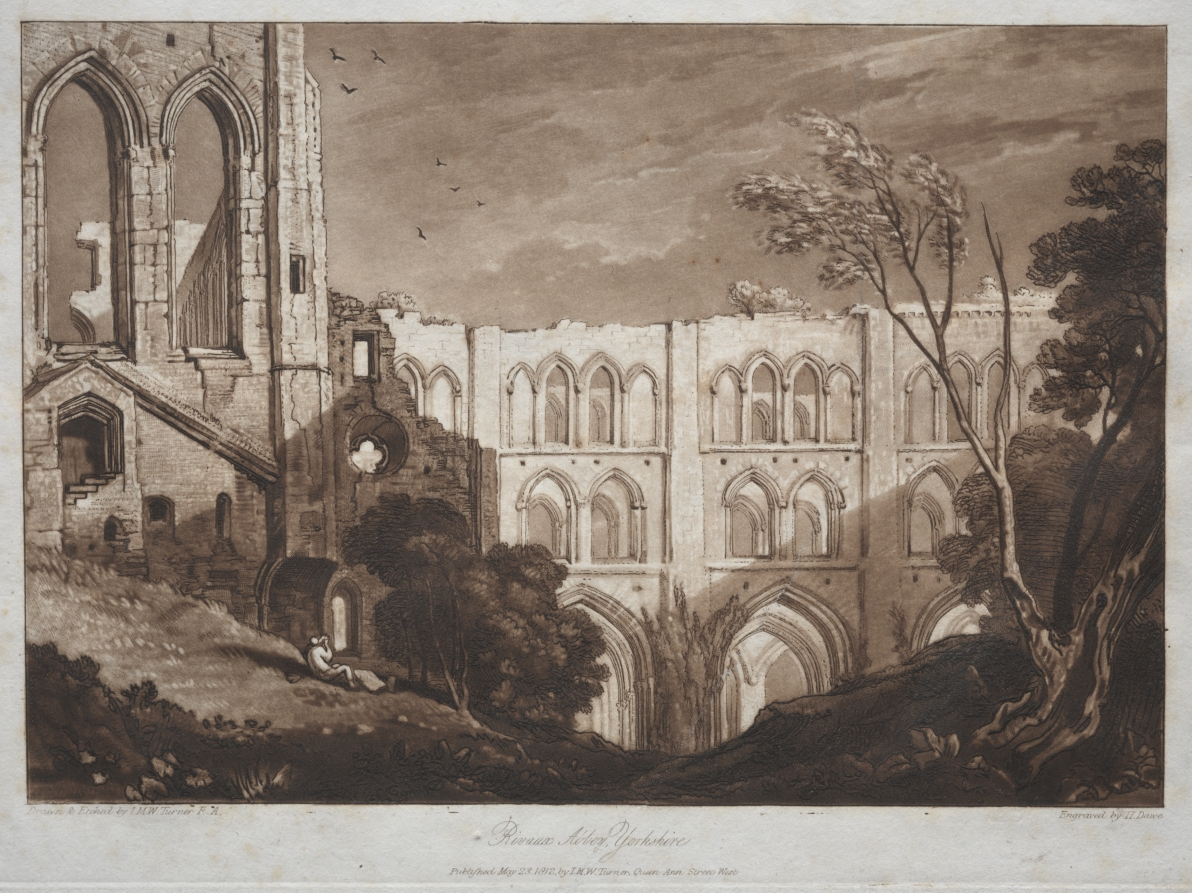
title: Liber Studiorum: Rivaux Abbey, Yorkshire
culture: England, 19th century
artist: Joseph Mallord William Turner (British, 1775–1851)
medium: etching and mezzotint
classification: Print